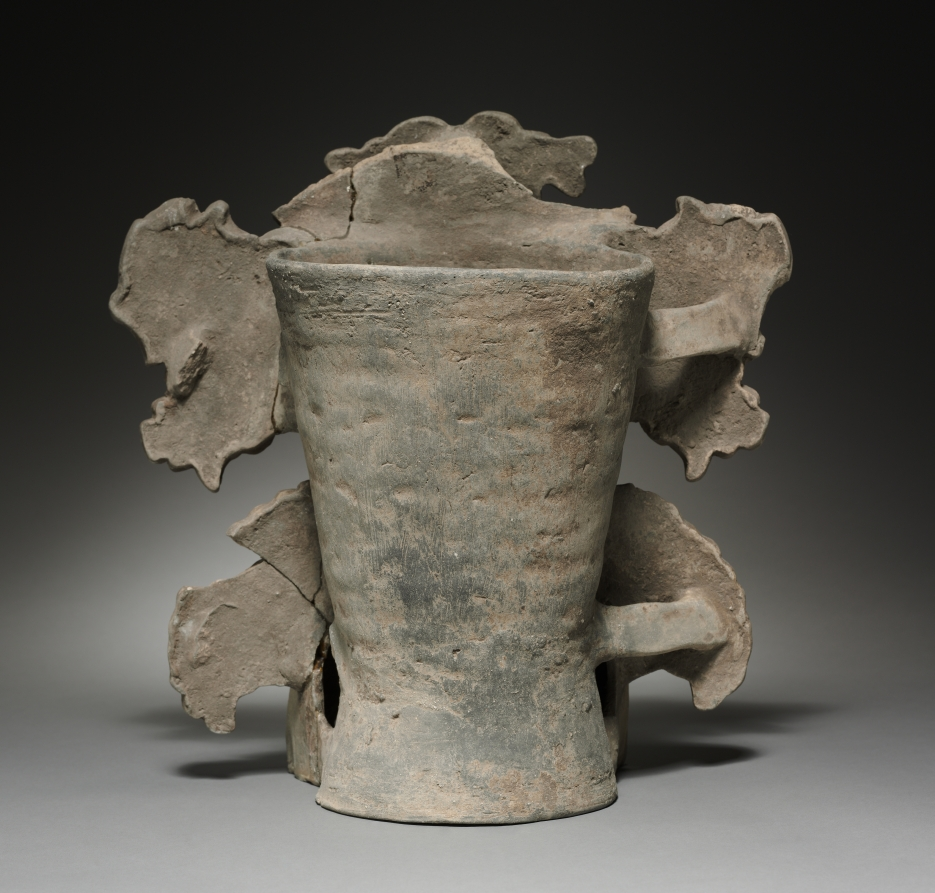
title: Funerary Urn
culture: Mexico, Oaxaca, Zapotec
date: 350–500 CE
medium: terracotta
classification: Sculpture